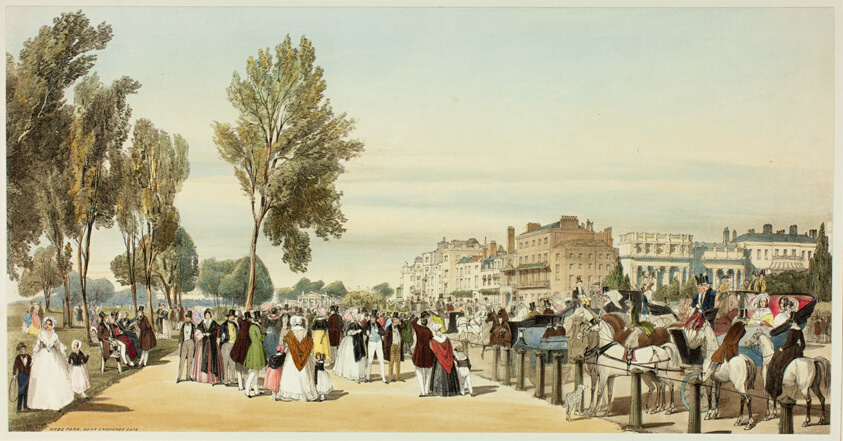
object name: Print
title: Hyde Park Near Crosvenor Gate, plate sixteen from Original Views of London as It Is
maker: Thomas Shotter Boys (English, 1803-1874); designed by Charles Ollier (English, 1788-1859)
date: 1842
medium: Hand-colored lithograph on paper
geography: England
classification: lithograph; print; prints and drawing